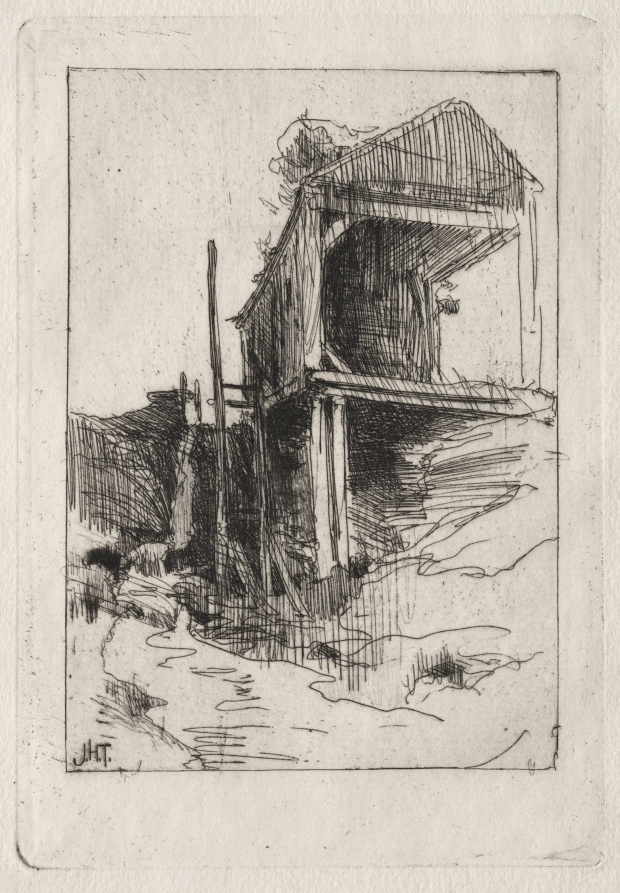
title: Old Mill, Branchville, Connecticut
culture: America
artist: John Henry Twachtman (American, 1853–1902)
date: c. 1888–89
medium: etching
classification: Print